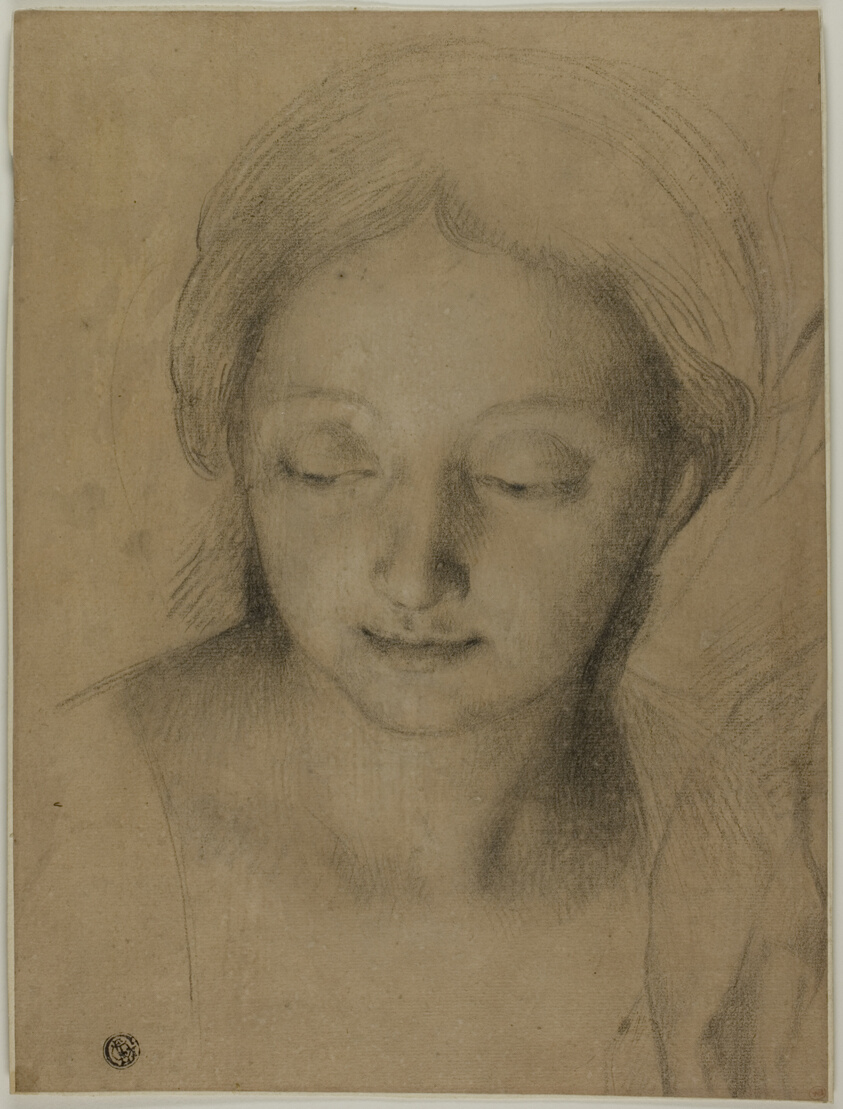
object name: Drawing and Watercolor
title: Head of a Woman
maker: Attributed to Antonio Cavallucci (Italian, 1752-1795); or Anton Raffael Mengs (German, 1728-1779)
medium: Black chalk, heightened with graphite and white chalk, on brown laid paper, laid down on cream laid card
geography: Italy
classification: graphite; drawings (visual works); prints and drawing